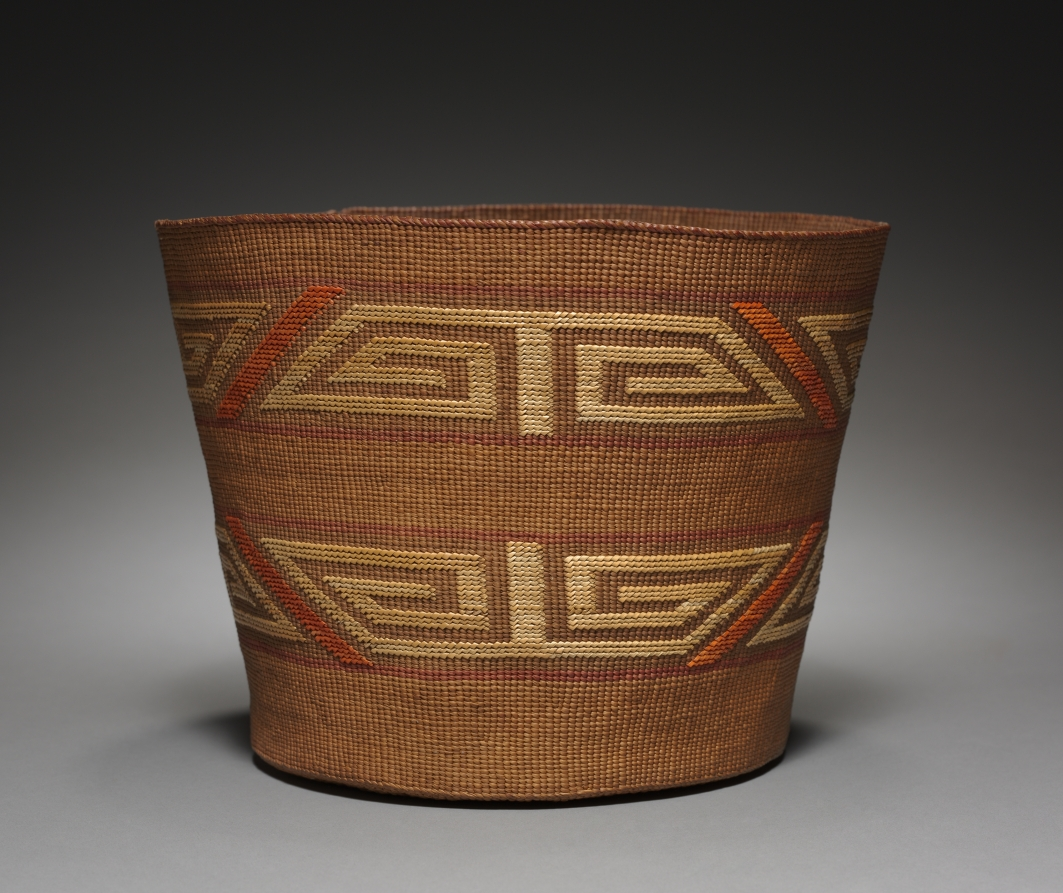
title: Bowl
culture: Northwest Coast, Tlingit, 20th century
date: before 1942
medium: twined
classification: Basketry